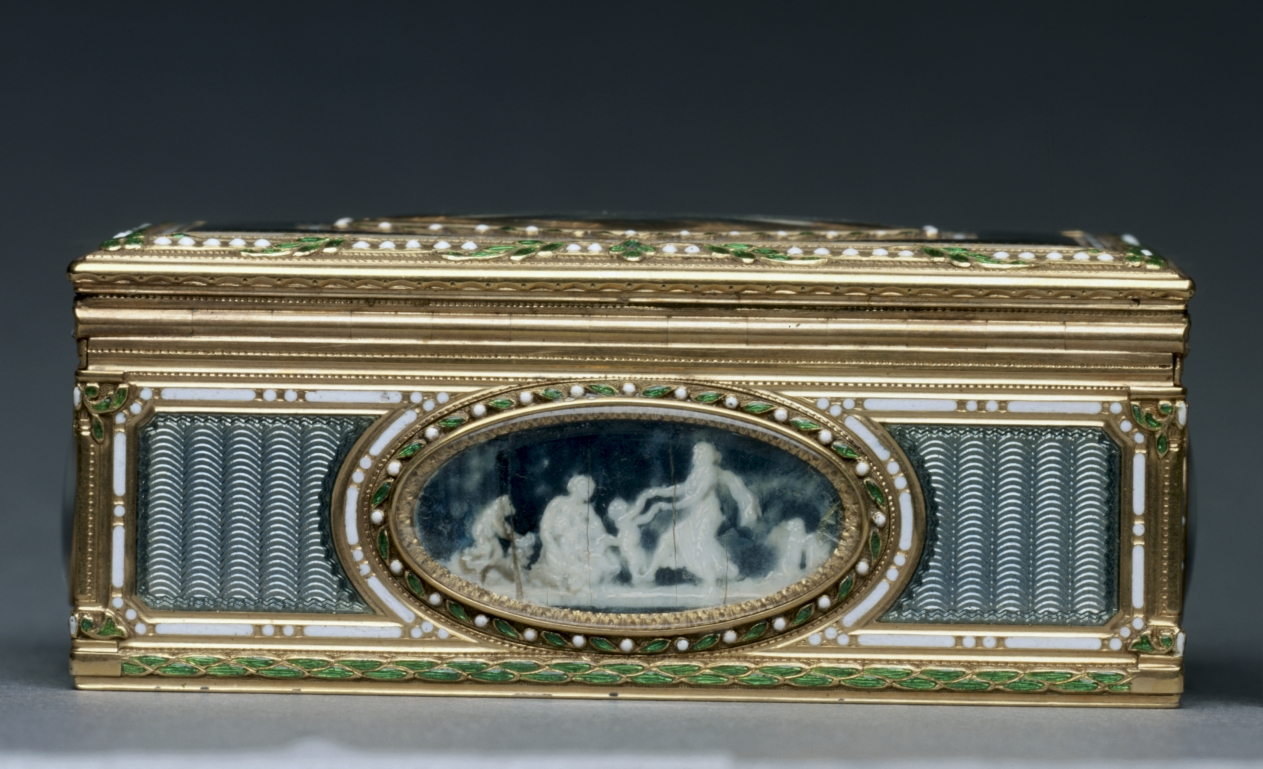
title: Snuff Box (Tabatière)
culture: France, 18th century (style of Louis XVI)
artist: François Chazeray (French)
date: 1777–78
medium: gold and enamel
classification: Metalwork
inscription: [Maker's mark of François Chazeray, master goldsmith in 1760, cover; bottom; front wall]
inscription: [Warden's mark (probably a crowned "O"), Paris, 1777-1778, cover; bottom; front wall]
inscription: [Illegible mark, bottom]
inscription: [Illegible mark, cover]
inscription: [Illegible charge mark, inside front]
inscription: [Discharge mark of Jean-Baptiste Fouache, Paris, 1774-1780, on neck at left.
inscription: [Outside of neck, modern inscription '4 (modern inscription]:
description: This box is decorated with figures of antiquity associated with love: winged cupids, dancing nymphs, and representations of the Greek goddess of love. These scenes are inspired by antique cameos, intricately carved gemstones crafted in ancient Greece and Rome. This interest in ancient iconography, symmetry, and classical compositions of gods and goddesses was characteristic of 18th-century neoclassicism.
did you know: Decorated with allegorical scenes of love, it is likely that this box was a present between lovers.